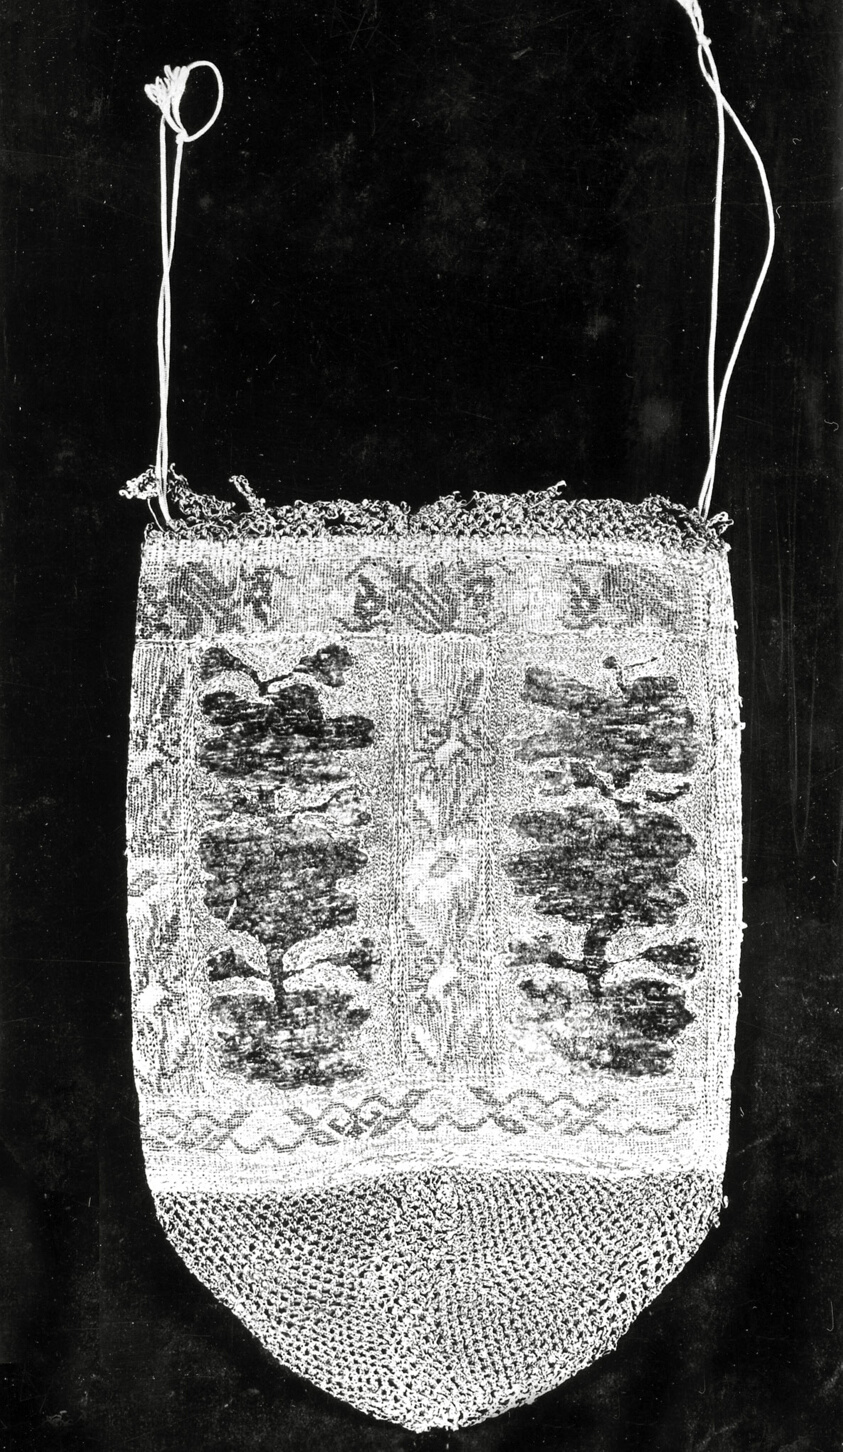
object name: Costume and Accessories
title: Bag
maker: France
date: 18th century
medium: plain weave linen; embroidered in metal strip wrapped on silk core, silk chenille, silk floss; in tent, cross, thread counted and free - running chain, oblique "gobelin" stitches; fancy knitted bottom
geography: France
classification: textile; bag - needlework; costume accessory - bag; costume accessory; costume; dress (garment); clothing